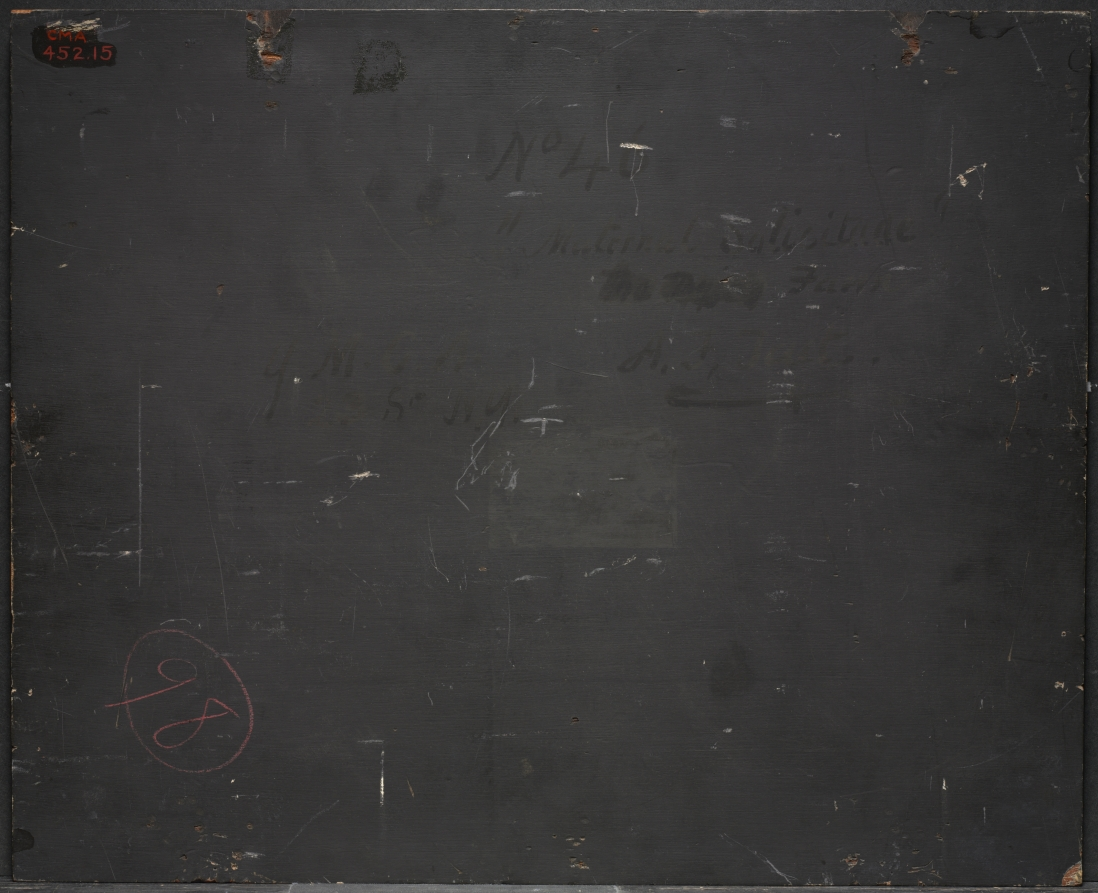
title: Maternal Solicitude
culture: America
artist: Arthur Fitzwilliam Tait (American, born England, 1819–1905)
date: 1873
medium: oil on wood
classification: Painting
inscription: Signed lower right: "A. F. Tait. . / N.Y. 1873"; inscribed on the back: " 'Maternal Solicitude' (The Dying Fawn)"